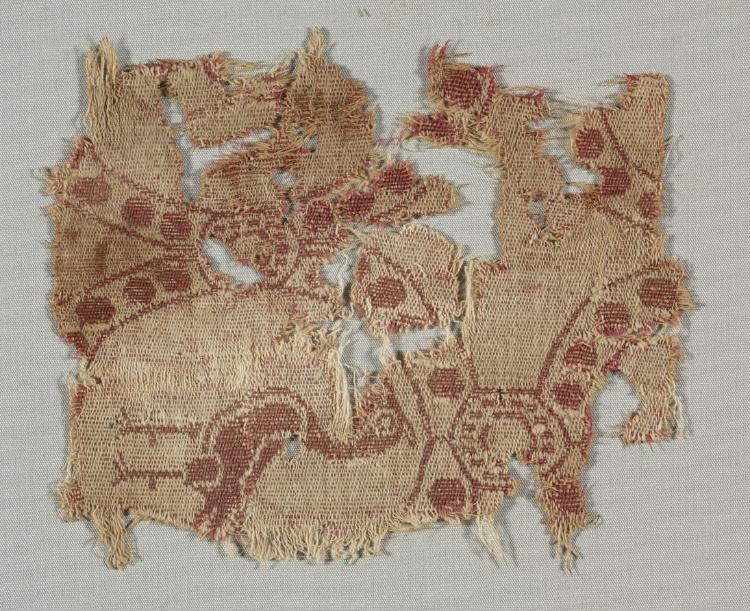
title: Fragment of roundels with single bird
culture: Iran, Iraq, or Syria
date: 700s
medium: samite: wool and cotton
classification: Textile